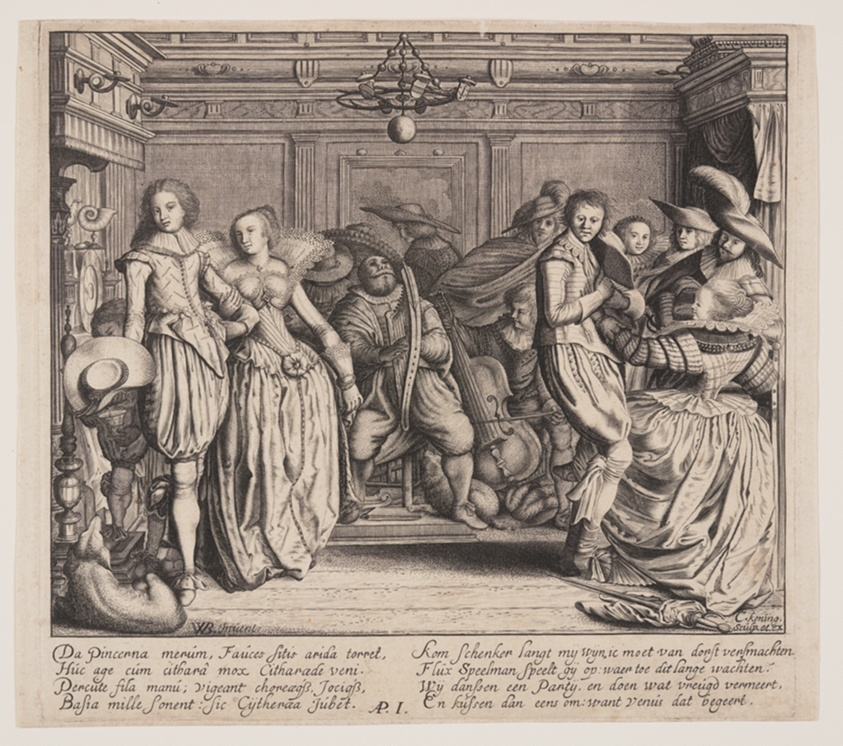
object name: Print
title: Interior with Musicians and Dancing Couples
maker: Cornelis Koning (Dutch, c. 1610–1671); after Willem Pietersz. Buytewech (Dutch, c. 1591-1624)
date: c. 1620-25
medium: Engraving on ivory laid paper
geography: Netherlands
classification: engraving; paper; print; prints and drawing